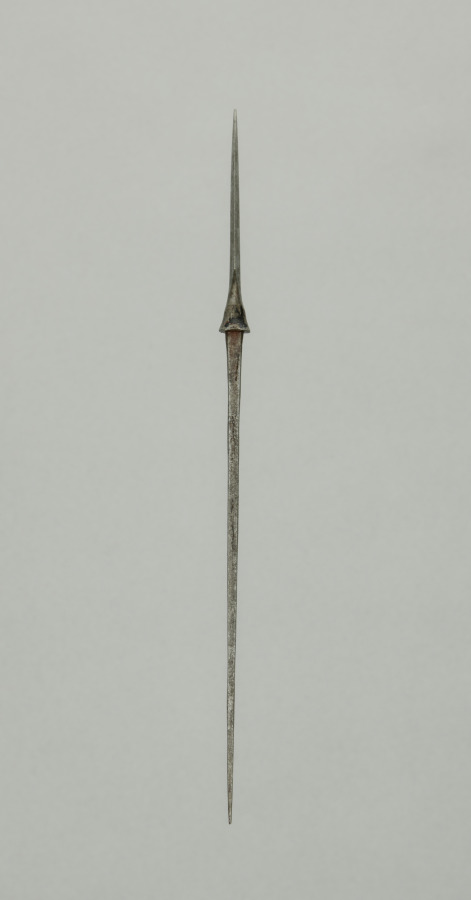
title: Arrow Point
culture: Japan, Edo period (1615–1868)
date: 1700s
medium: steel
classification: Arms and Armor